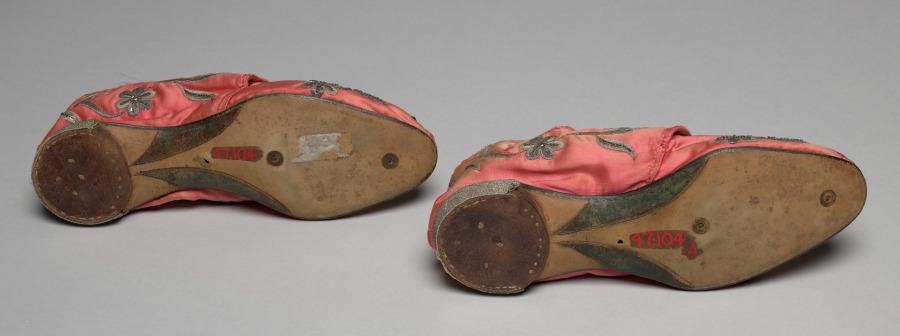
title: Pair of Slippers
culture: Italy, Venice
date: early 1700s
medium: Silk: satin weave with silver metal thread embroidery and trim; spangles; leather soles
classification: Garment